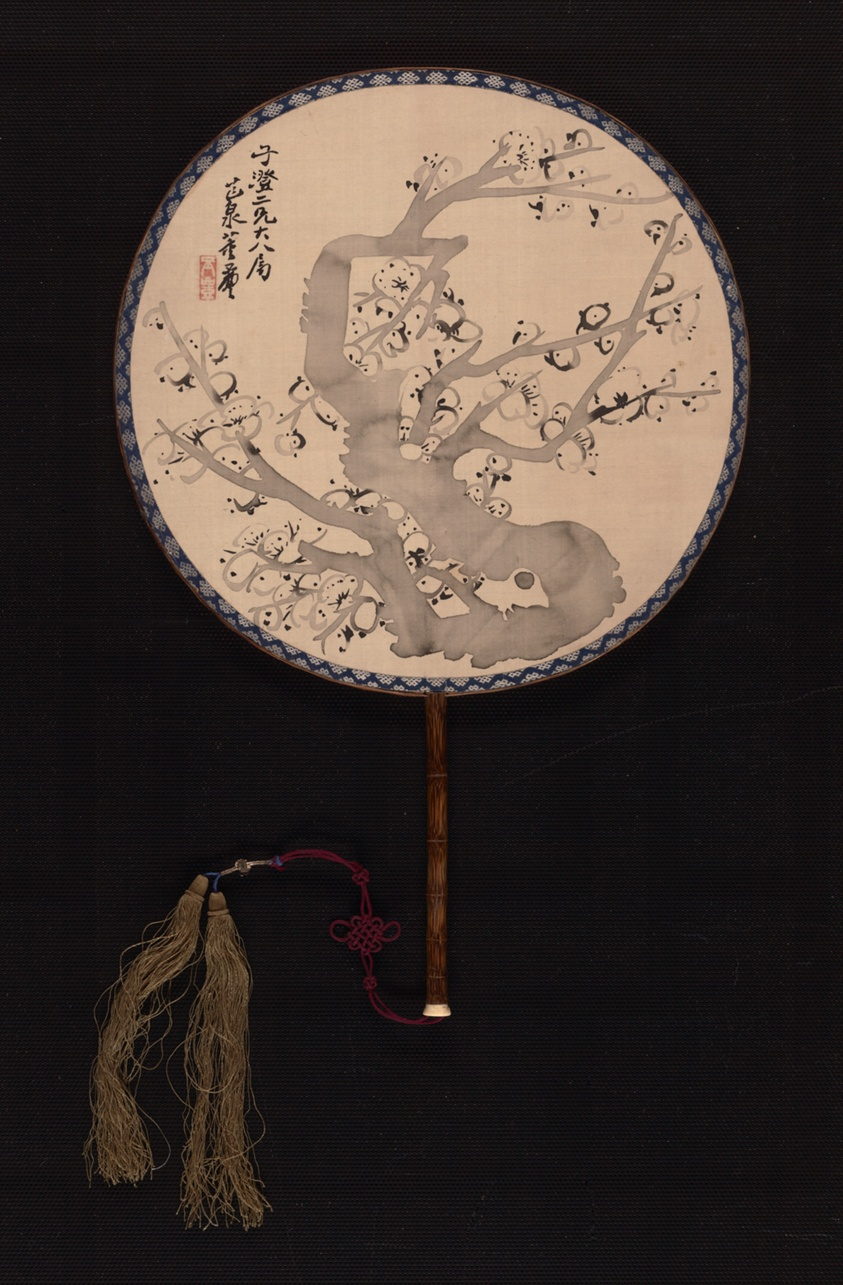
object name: Costume and Accessories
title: Flowering Plum Blossom 梅花竹柄团扇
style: Chinese (culture or style)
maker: Dong Feng; Chinese, active 19th century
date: Qing dynasty (1644–1912), 1892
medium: Fan; ink on silk, with bamboo-and-ivory handle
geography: China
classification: fan; accessories (object genre); asian art; costume